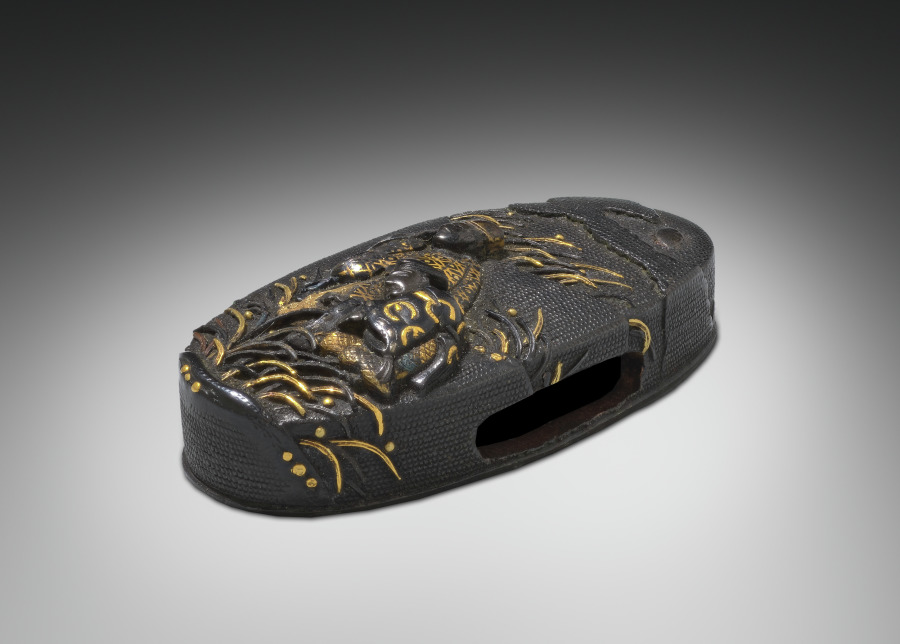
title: Sword-Hilt Pommel (Kashira)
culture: Japan, Edo period (1615–1868)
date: 1700–1850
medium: shakudo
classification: Arms and Armor